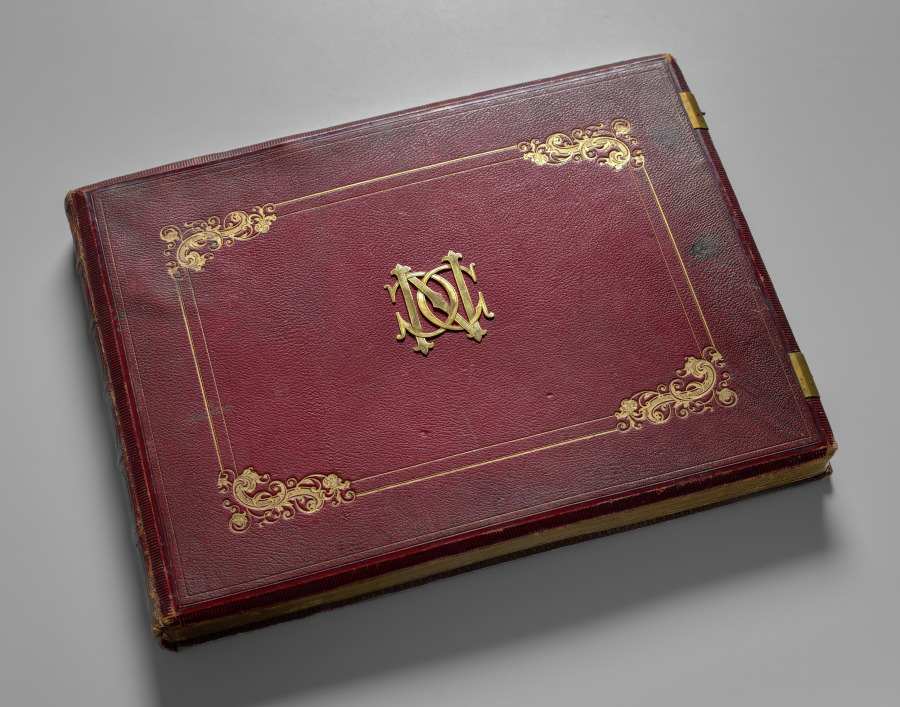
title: Photographs of Northern India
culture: England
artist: Samuel Bourne (British, 1834–1912)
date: 1863–70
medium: Album of 50 albumen prints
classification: Bound Volume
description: The 50 images in this album, all taken in the 1860s, move from the hill towns of the Himalayas down to cities including Lahore (now in Pakistan), Delhi, Lucknow, Agra, Benares (now Varansi), and Calcutta (now Kolkata). Architectural studies of major monuments offer valuable historical records of what sites such as the Taj Mahal and the imperial mosque of the Mughal emperors in Delhi looked like before twentieth-century restorations.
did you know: Samuel Bourne, the author of most the images in this album, was a banker in England before he moved to India to become a professional photographer.